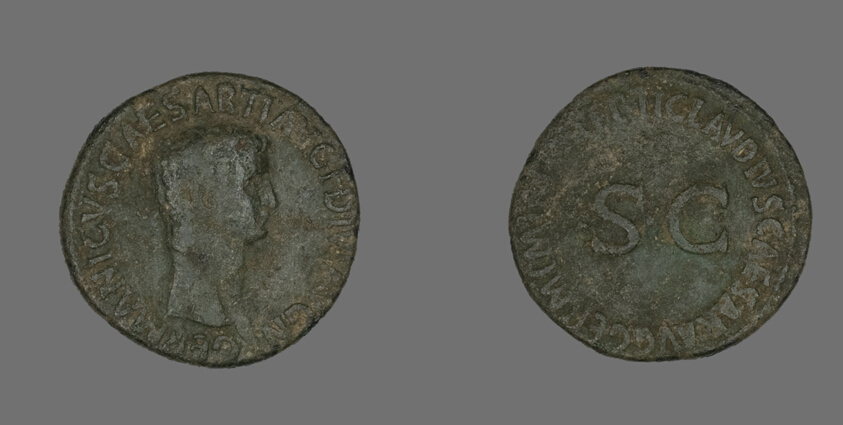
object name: Coin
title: As (Coin) Portraying Germanicus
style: roman (ancient, style or period)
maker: Roman, minted in Rome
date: 50-54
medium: Bronze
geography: Roman Empire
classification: coin; ancient art